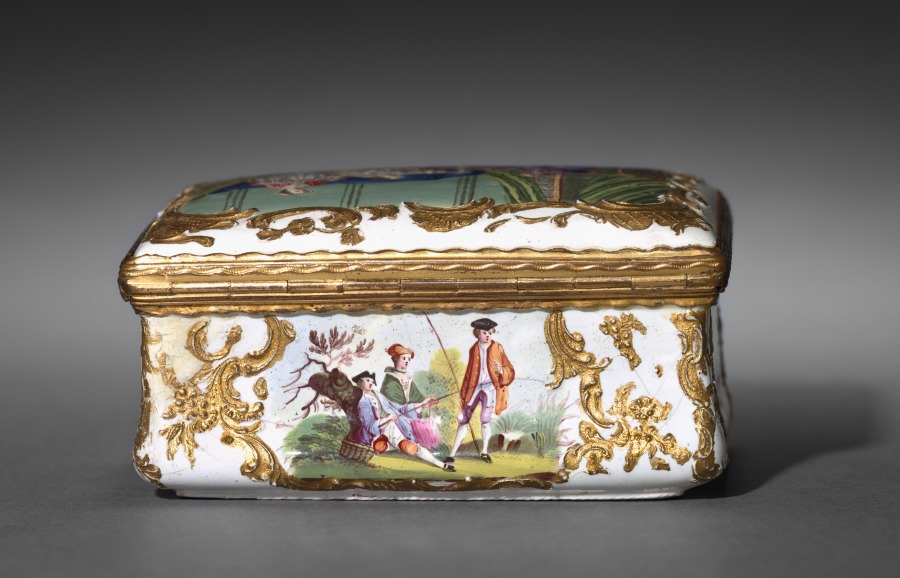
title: Box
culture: England, 18th century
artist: South Staffordshire Factory (British)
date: 1760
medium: enamel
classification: Enamel